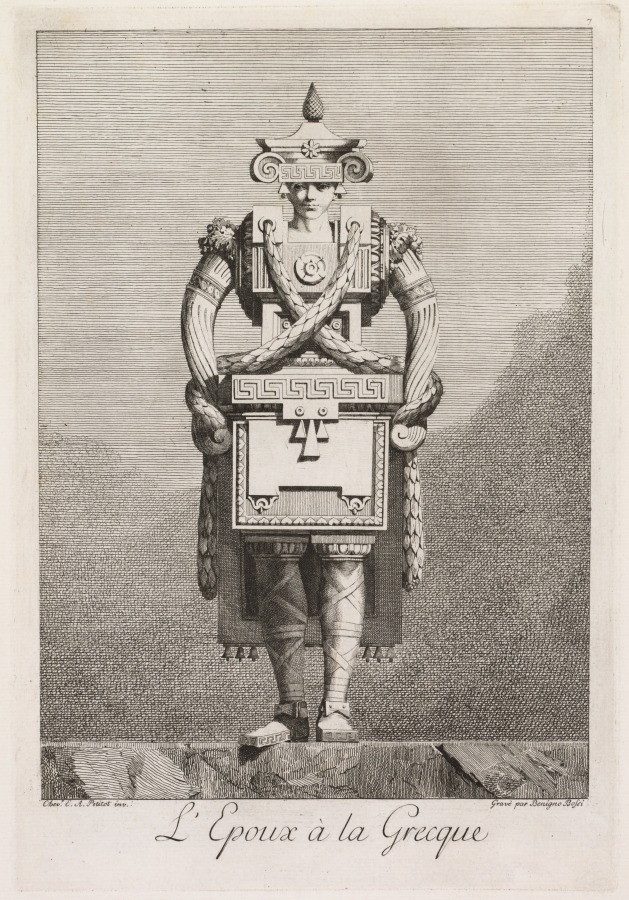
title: Groom in the Greek Style, Plate 7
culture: Italy, 18th century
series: Mascarade à la Grecque:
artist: Benigno Bossi (Italian, 1727–1792)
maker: after Ennemond Alexandre Petitot (French, 1727-1801)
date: 1771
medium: etching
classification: Print